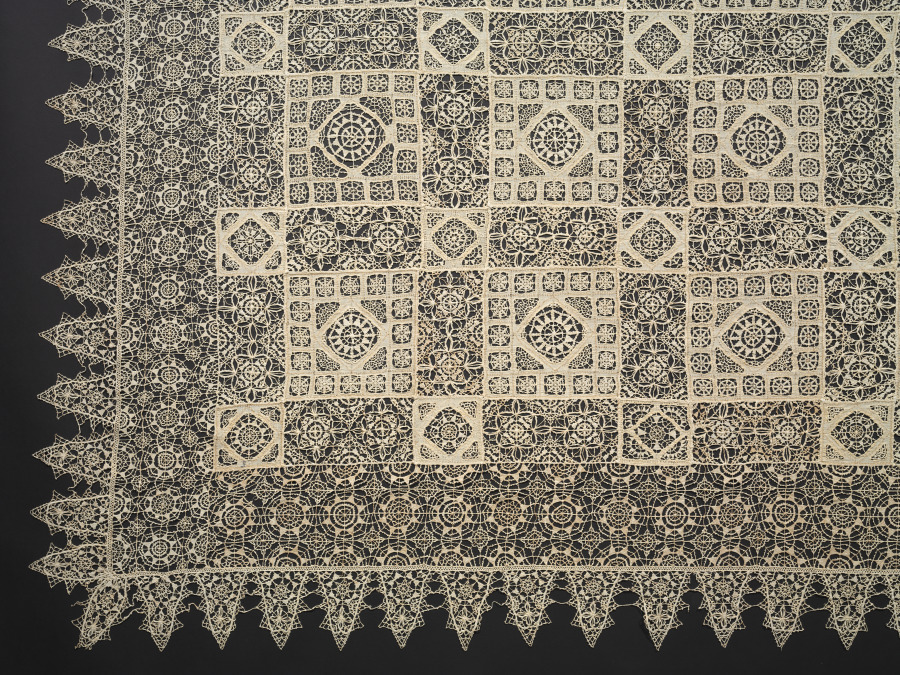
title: Lace Cloth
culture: Italy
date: 1560–1600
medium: Linen; needle lace (cutwork and reticella)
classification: Lace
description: Consisting of more than 80 squares of cutwork (a cut and embellished linen ground) and rectangles of reticella (needle lace), this luxurious cover could have been made by a single person or several people who divided the work. Close looking reveals that the cloth is made with threads of two very slightly different colors: bleached and unbleached linen. Together the sections resemble snowflakes, which are of similar shape and size but vary subtly from one another. The perplexing dark stitches in the upper left corner do not repair damage, and might be the maker’s signature.